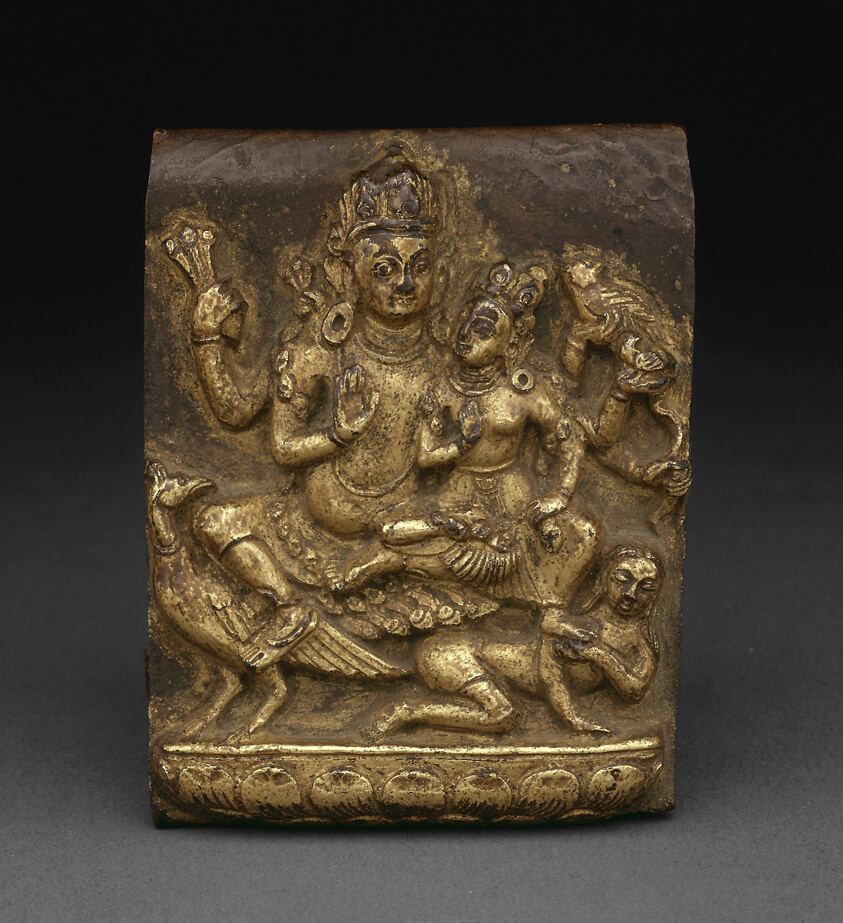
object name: Religious/Ritual Object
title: Plaque with Local Deity Ghantakarna and Spouse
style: Himalayan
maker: Nepal; Kathmandu Valley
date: c. 1600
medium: Gilt bronze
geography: Kathmandu Valley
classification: bronze; metal; sculpture; asian art; ritual objects